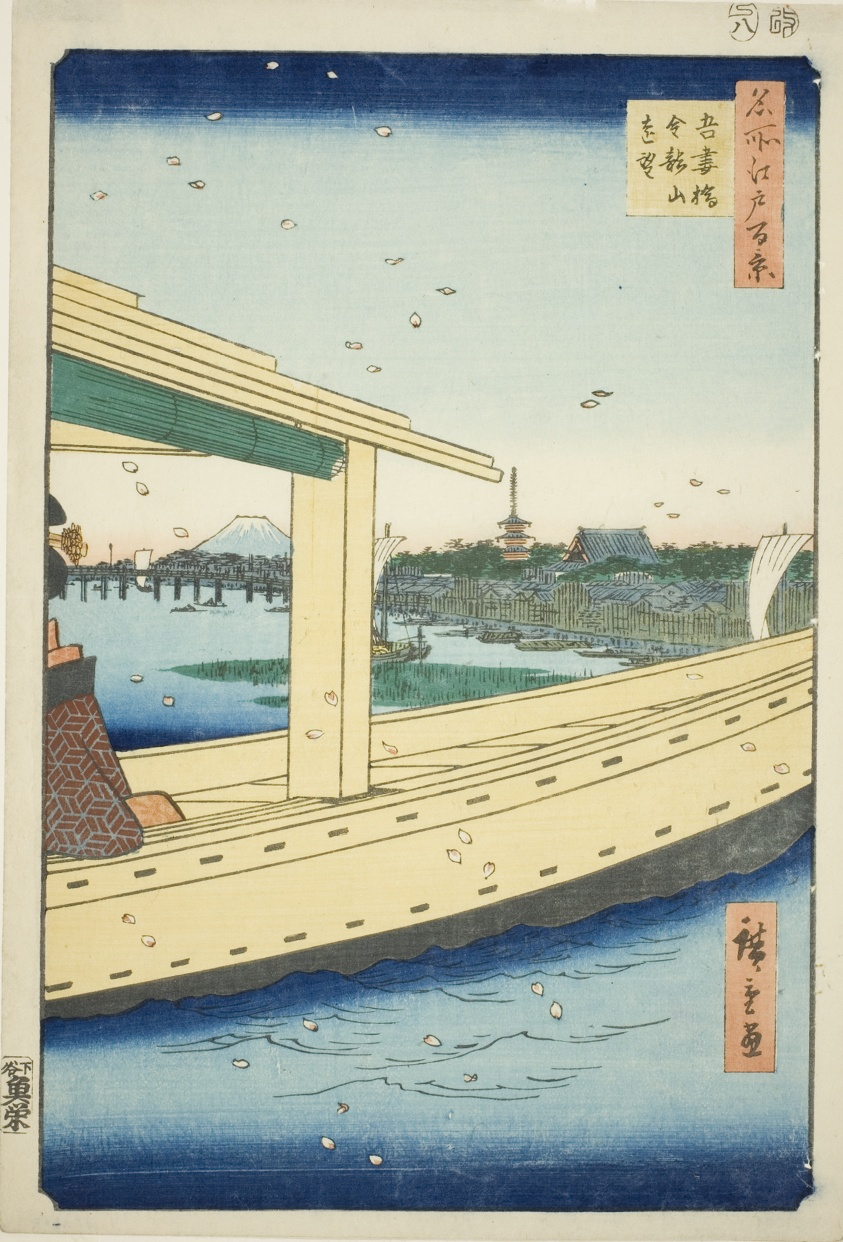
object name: Print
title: Distant View of Azuma Bridge and Kinryuzan Temple (Azumabashi Kinryuzan enbo), from the series "One Hundred Famous Views of Edo (Meisho Edo hyakkei)"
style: Japanese (culture or style)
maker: Utagawa Hiroshige 歌川 広重; Japanese, 1797–1858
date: 1857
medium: Color woodblock print; oban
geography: Japan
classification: woodblock print; print; asian art